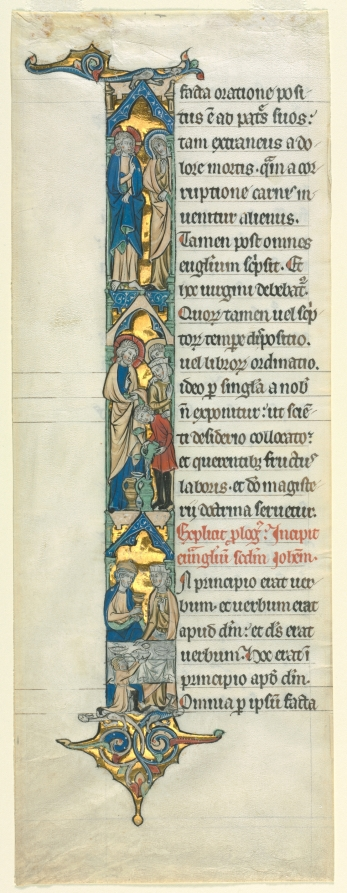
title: Partial Leaf from a Latin Bible: Initial I[n principio] with the Marriage at Cana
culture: Northeastern France, Cambrai, 13th century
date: c. 1260–1270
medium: ink, tempera, and gold on vellum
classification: Manuscript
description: The illuminator of this initial placed three small scenes one above another to suggest the vertical stem of the initial I, here standing for the introductory passages of the Gospel of Saint John, In principio erat verbum . . . (In the beginning was the word . . .). Such initials have been called "ladder initials" because the individual scenes were arranged one on top of the other to be read in sequence. Each group of figures stands beneath a cusped gable and depicts scenes from the Marriage at Cana. At the top, Christ and the Virgin speak together; at the center, Christ tells the attendant to fill the jars; and below, the banquet proceeds after the miraculous change of water into wine. The present leaf (actually a fragment) comes from a large lectern bible, which probably existed in several volumes because of its size. In the 1100s and 1200s, the large multivolume bible was a standard form used for refectory readings at meals or else kept in a library for reference.